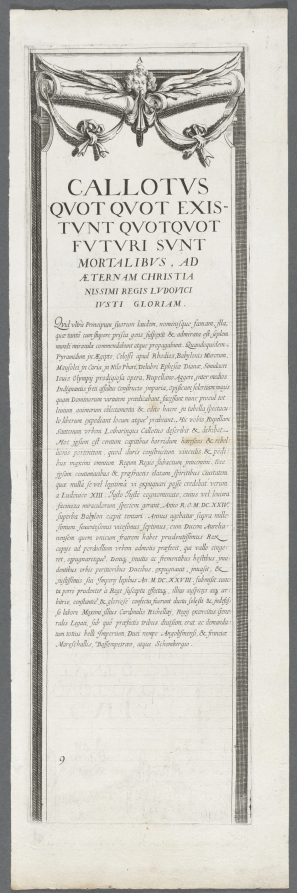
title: The Siege of La Rochelle: Plate 8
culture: France, 17th century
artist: assistant of Jacques Callot (French, 1592–1635)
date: 1628–1630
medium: engraving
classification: Print